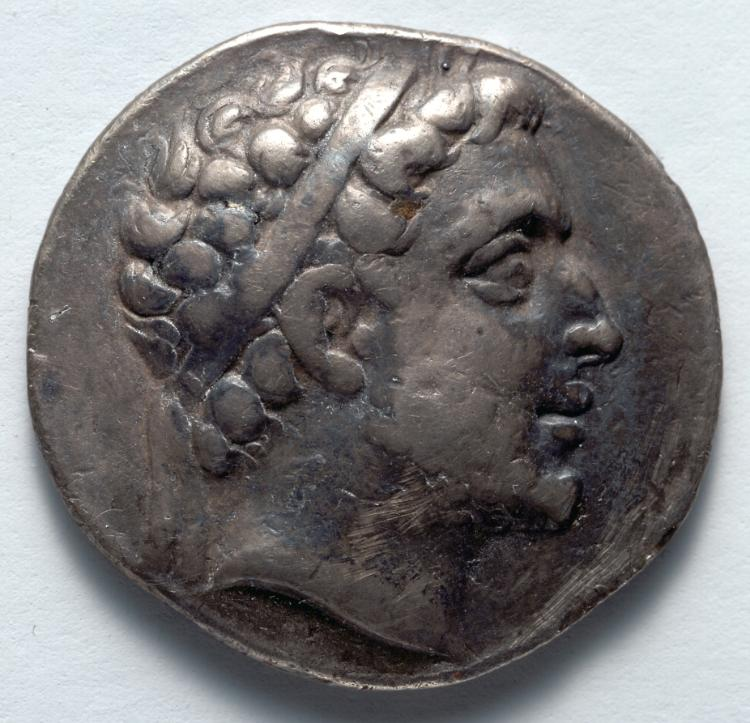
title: Didrachm: Head of Philip V, r., diademed and slightly bearded (obverse)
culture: Greek, Macedonian, minted in Macedonia, reign of Philip V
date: 220–179 BCE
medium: silver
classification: Coins